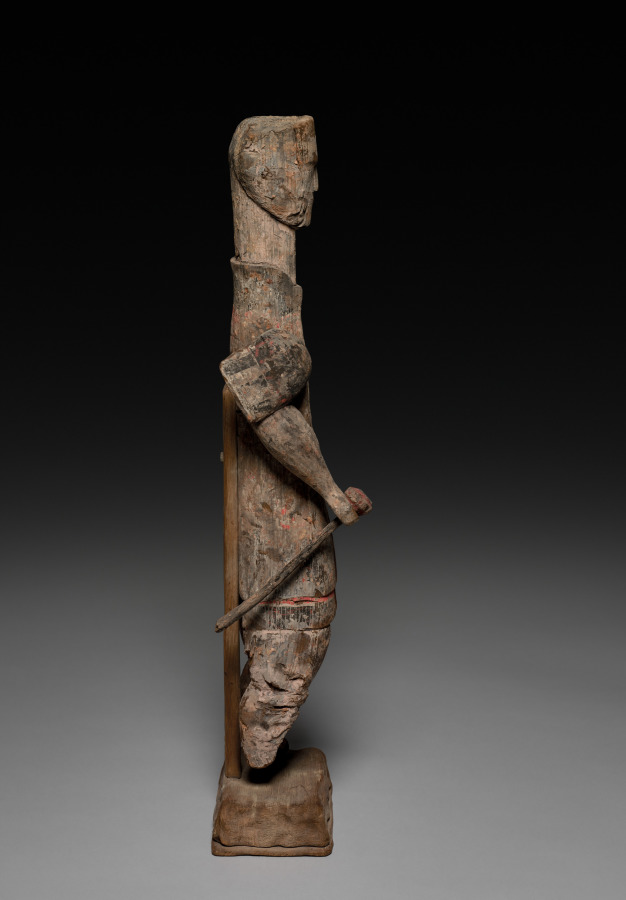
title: Figure with Sword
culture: China, Eastern Zhou dynasty (770–256 BCE), Warring States period (475–221 BCE)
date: 400–300 BCE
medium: wood with traces of polychromy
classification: Sculpture